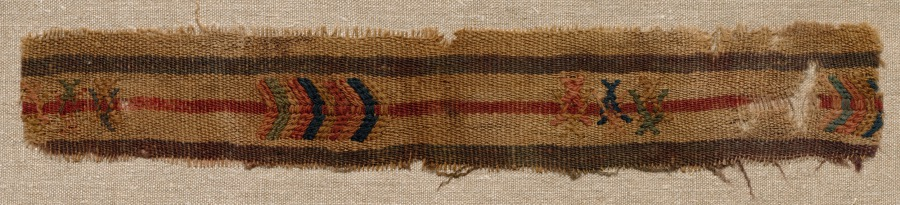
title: Wool Embroidery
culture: Egypt, early Islamic period, 8th-9th century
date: 700s - 800s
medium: wool embroidery on wool tabby ground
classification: Embroidery